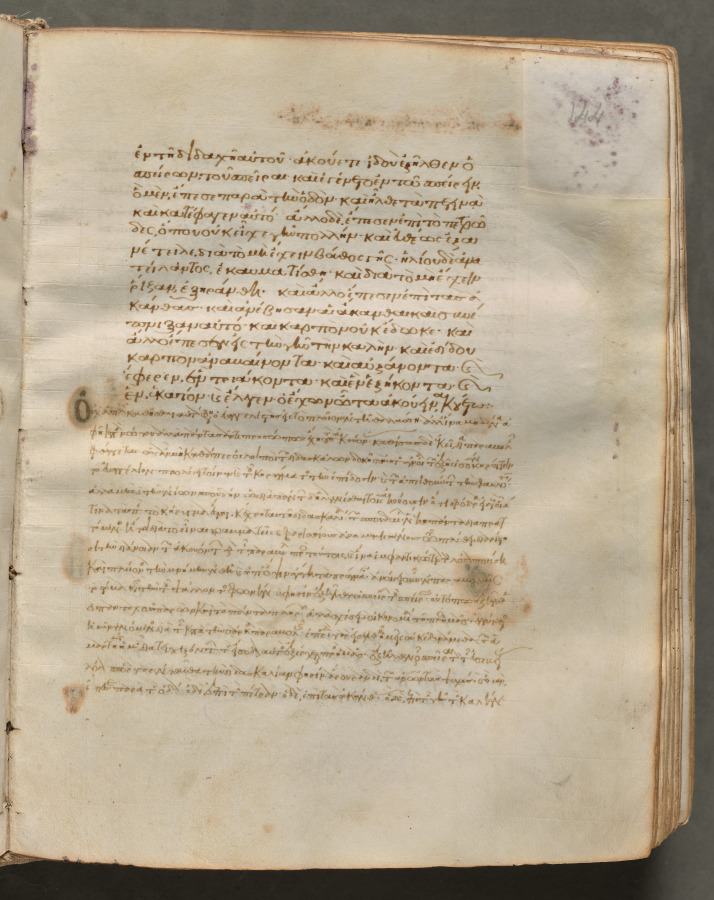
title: Text, folio 143 (recto), from a Gospel Book with Commentaries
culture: Byzantium, Constantinople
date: c. 1000–1100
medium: ink, tempera, and gold on vellum; leather binding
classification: Bound Volume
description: Each of the four gospels in this book opens on a page with brilliantly illuminated borders depicting the author of the text as well as birds-principally peacocks, symbols of the immortality of the soul-and fountains, representing the fountain of life and the salvation of the soul. This volume consists of 428 leaves with texts in Greek. Its level of sophistication suggests that it was probably written and decorated in a monastery in Constantinople.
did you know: Gospel Books were carried in procession through Byzantine churches.